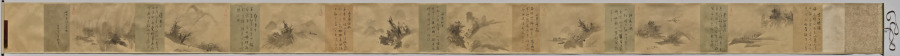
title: Poems and Pictures of the Eight Views of Xiao-Xiang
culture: Japan, Momoyama period (1573–1615)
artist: Unkoku Tōgan (Japanese, 1547–1618)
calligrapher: Inkei Gentetsu (Japanese, 1562–1612)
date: 1605–12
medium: Handscroll; ink on paper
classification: Painting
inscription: Each painting sealed with red gourd-shaped seal reading Unkoku (雲谷) and a square seal reading Tōgan (等顔).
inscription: Each painting prefaced with a titled poem on the Eight Views of Xiao-Xiang by Yujian Ruofen (active late 13th century) inscribed by Japanese Buddhist monk Inkei Gentetsu (1562–1612).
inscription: 右寫玉㵎之筆勢／雪舟末葉等顔筆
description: Unkoku Tōgan brushed these scenes using the splashed-ink technique associated in Japan with the Chinese monk Yujian Ruofen (active late 1200s). Xiao-Xiang refers to the region in present-day Hunan province, where the Xiang River and its tributaries converge. Each of the eight views evokes a time of day or season. The earliest surviving series of Xiao-Xiang paintings is by Wang Hong (active mid-1100s), but textual evidence tells us the theme appears earlier. It was later adopted in Japan and Korea, as seen here. The poems were inscribed by Inkei Gentetsu, the third abbot of the Rinzai Zen temple Tōshunji, Japan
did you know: The “Tō” of Tōgan comes from the name of painter Sesshū Tōyō (1420–1506).